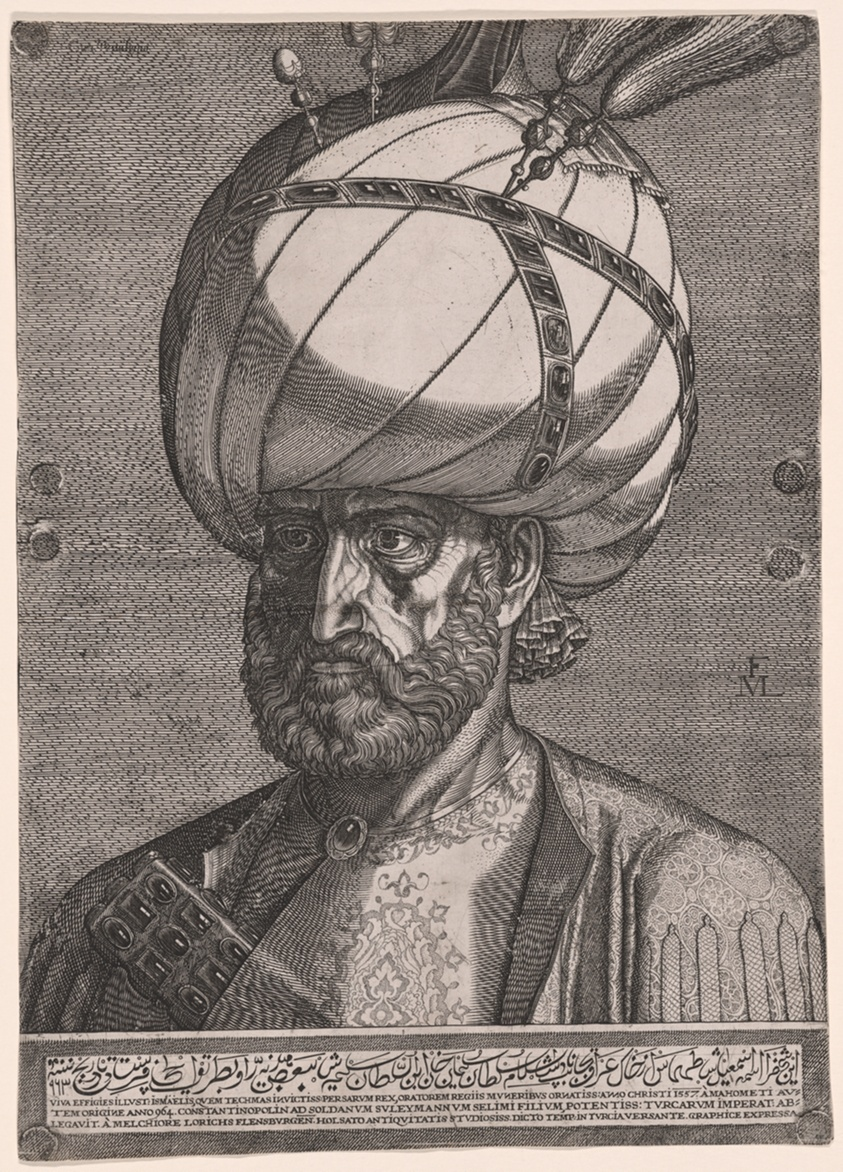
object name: Print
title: Portrait of Ismail, Ambassador of the Persian Shah Tahmasp I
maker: Melchior Lorck; Danish, 1526 or 1527–after 1588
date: 1562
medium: Engraving in black on ivory laid paper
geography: Denmark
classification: prints and drawing; paper; print